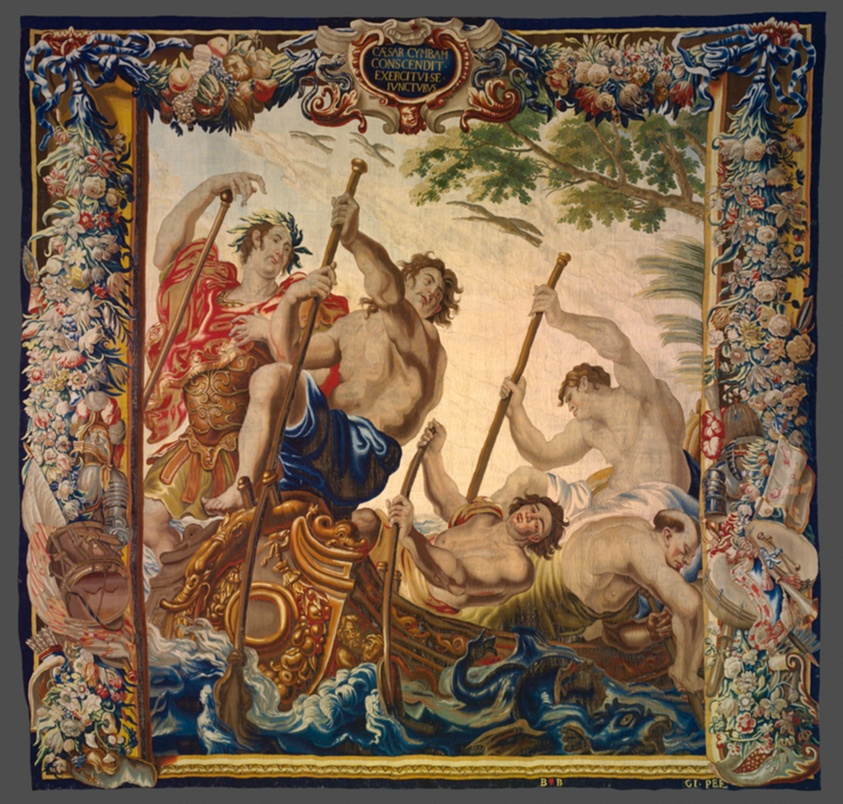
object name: Textile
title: Caesar Embarks by Boat to Join His Army from The Story of Caesar and Cleopatra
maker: After a design by Justus van Egmont (1601–1674); Woven at the workshop of Gerard Peemans (1637/39–1725); Flanders, Brussels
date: c. 1680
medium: Wool and silk, slit and double interlocking tapestry weave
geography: Flanders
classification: weaving - tapestry; textile